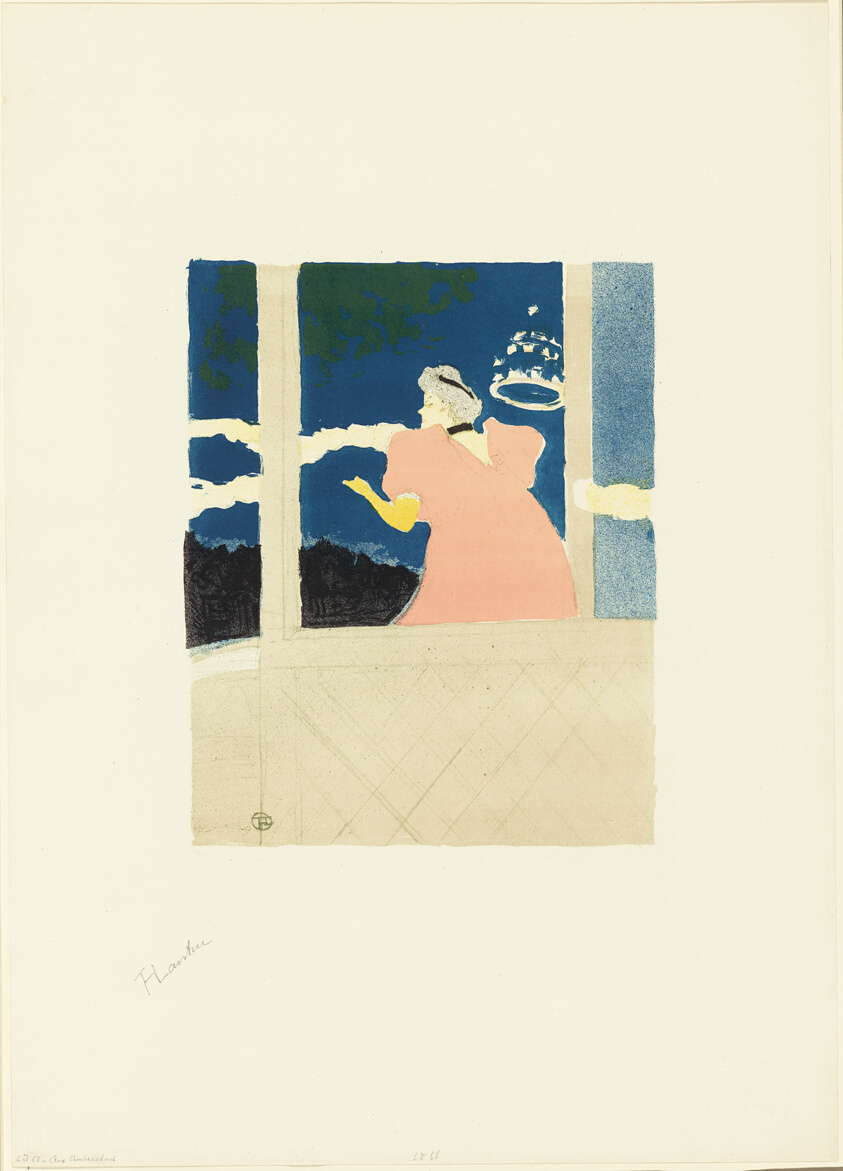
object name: Print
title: At the Ambassadeurs—Singer at the Café-concert, from the sixth album of L'Estampe originale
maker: Henri de Toulouse-Lautrec (French, 1864-1901)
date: 1894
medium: Color lithograph on ivory wove paper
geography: France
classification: lithograph; print; prints and drawing